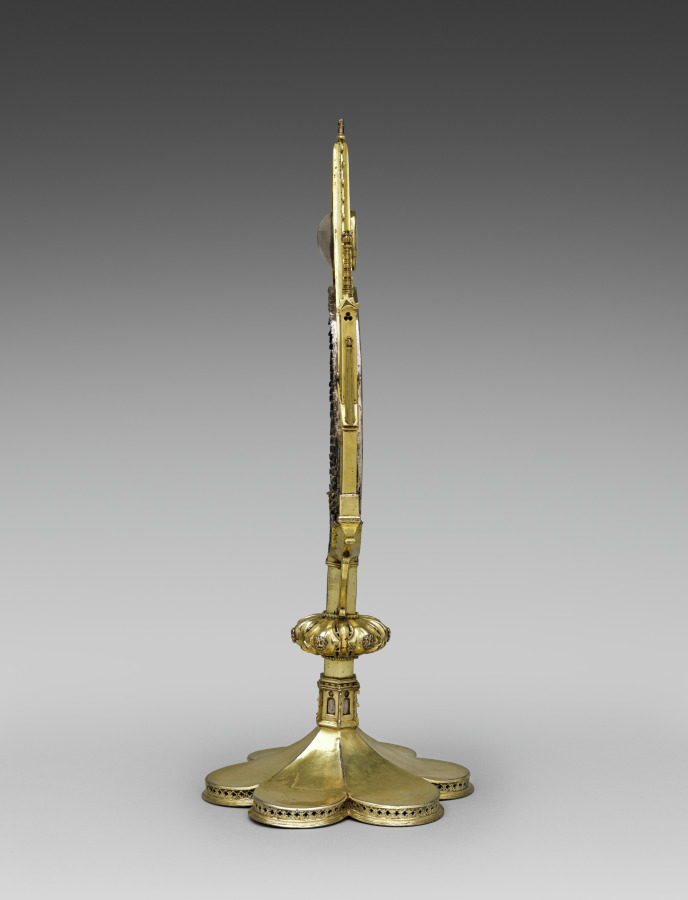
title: Monstrance with the "Paten of Saint Bernward"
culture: paten: Germany, Lower Saxony, Hildesheim; monstrance: Germany, Lower Saxony, Brunswick, Gothic period, paten: 12th century; monstrance: 14th century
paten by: Saint Oswald Reliquary Workshop (German)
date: c. 1180–1190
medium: silver, gilded silver, niello, rock crystal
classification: Metalwork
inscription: located in monstrance: two slivers of the True Cross surrounded by parchment with the inscription: DE SIGILLO DOMINI. Paten inscribed: +EST.CORPVS.IN.SE.PANIS.QVI.FRANGITVR.IN.ME:VIVET.IN ETERNVM. QVI.BENE.SVMIT.EVM. (outer rim); +HVC.SPECTATE. VIRI.SIC.VOS MORIENDO.REDEMI.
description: Designed to facilitate the display and veneration of ten relics, this sumptuous ostensorium (from the Latin ostendere, meaning "to show") is one of the most unusual reliquaries in the Guelph Treasure. Elements of contemporary Gothic architecture in miniature frame an elaborately decorated liturgical paten, the shallow disc or plate used for the elevation of the Eucharist during Mass. Fragments of the True Cross are enclosed behind a rock crystal in the gable, while other saintly relics, each wrapped in silk and identified by inscriptions, are visible only from the back. The paten is inscribed on its outer rim with the words "The bread which is broken in me is the body itself. He who receives it in good faith shall live in eternity." Another inscription surrounding the image of the enthroned Christ at the paten's center, reads, "Behold, o men, I have thus redeemed you with my death." Symbols of the four Evangelists and personifications of the four cardinal virtues complete the paten's iconographic program.